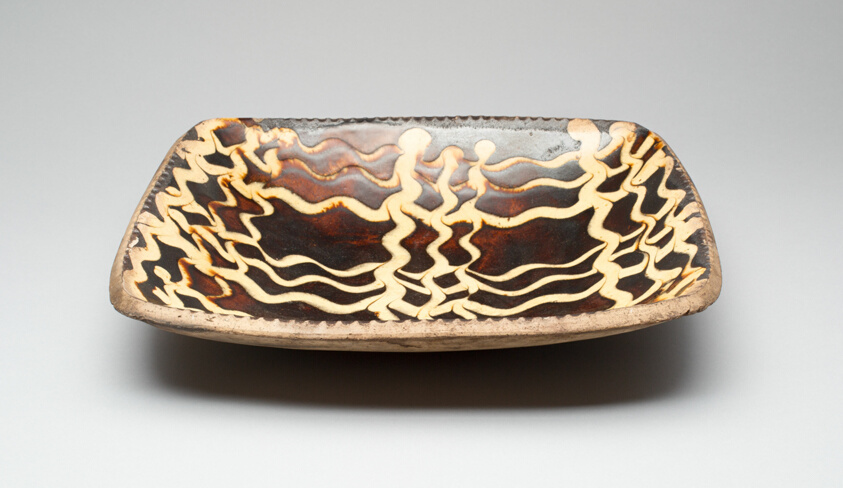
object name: Decorative Arts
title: Meat-pie dish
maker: Artist unknown (American, 19th century)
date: 1800–50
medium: Earthenware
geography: United States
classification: vessel for serving food; earthenware; dish (vessel); american decorative arts; ceramics; european decorative arts; decorative arts